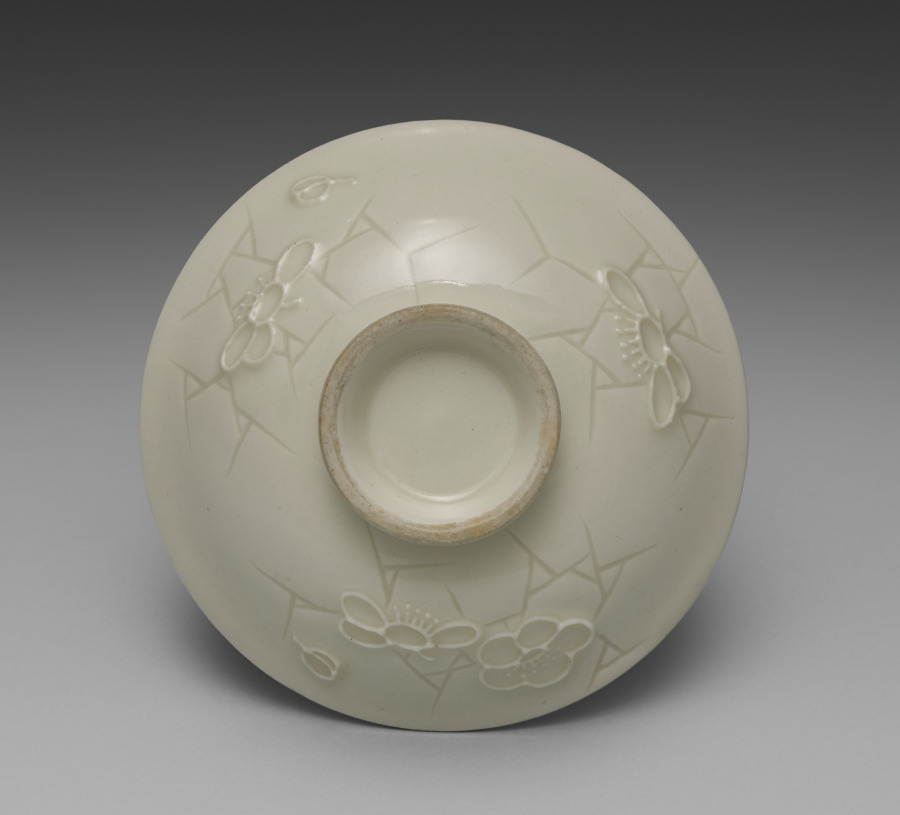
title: Cover for a Bowl from Dining Set with Plum Blossoms and Cracked-Ice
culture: Japan, Meiji period (1868–1912)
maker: Seifū Yohei II (Japanese, 1844–1878)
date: c. 1875–78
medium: Porcelain with molded designs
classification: Ceramic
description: Each item in this set has a delicate low-relief design of flowering plum branches over scattered, intersecting lines meant to resemble the cracked-ice surface of a frozen body of water and is signed on the base in gold pigment. While Yohei II produced many fine works in underglaze blue, like those produced by Kiyomizu Shichibei, he also made works in quite different styles later in his career, from the early 1870 s. In 1873, he was appointed purveyor to the Industrial Center of Kyoto Prefecture, a designation associated with Kyoto’s efforts to reach an international market through the port of Kobe; and from 1875 until his death, he was involved in national-level projects to present Japanese ceramics across the world. It was during this period that Yohei III was apprenticed to Yohei II, and it has been suggested that this set may in fact be an early example of Yohei III’s work, which he signed with his teacher’s name. Decorated with flowers resembling Japanese textile motifs, the set calls to mind the design of Yohei II’s pair of vases with plum blossoms in the Victoria and Albert Museum. Here, the elaborate trees created for a formal public exhibition setting have been translated into the approachable blossoms of the genteel domestic environment. While the designs are consistent across the pieces, each raised flower petal and pistil and each incised line in the ice was done by hand, so the cups, bowls, and dishes are similar yet unique. The bottoms of two boxes once identified the set’s owner, but the information has been deliberately obscured with black ink. However, inscriptions still visible appear to indicate two occasions, once at the end of July 1886 , and once again in June 1916 , when parts of the set were requested from Hokura in Niigata Prefecture. The location corresponds to a neighborhood in the present-day city of Jōetsu. The surname Tsuji 辻 also appears on a paper tag affixed to one of the box cloths. Future research may possibly reveal more about their provenance. A vase by Yohei III in a private collection combines the formal grandeur of the Yohei II vases in the Victoria and Albert Museum with the gentler design of this dining set, placing flowering plum trees against soft, scalloped-edge clouds resembling those in golden screens.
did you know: The dining wares have a creamy white coloration that the four boxes containing them identify as Korean in style.